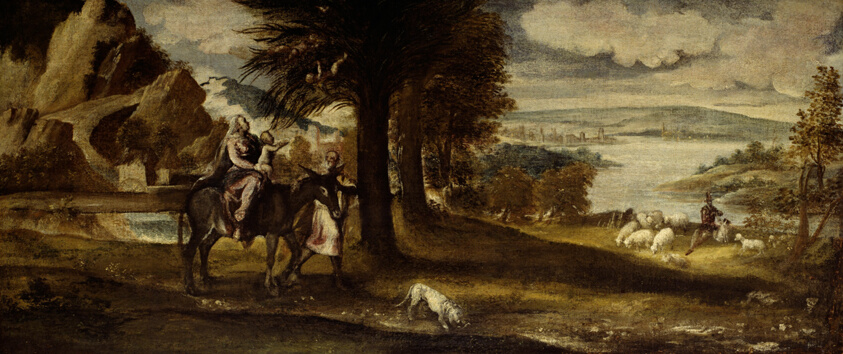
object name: Painting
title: The Flight into Egypt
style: sixteenth century, 16th Century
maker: Venetian (Attributed to Andrea Meldolla Schiavone (Italian, 1522-1564))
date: c. 1545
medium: Oil on canvas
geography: Venice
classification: oil on canvas; Italian; oil paintings (visual works); paint; painting; european painting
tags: holy family, animals, foliage, sky, clouds, biblical, religious scenes, religious figures, religious, religion, Christianity, Christian subjects, mountain, mountains, water, landscape, dog, tree of life, Virgin Mary, Virgin and child/Madonna and child, Jesus, sheep, donkeys, travel, Century of Progress, world's fairs, Chicago World's Fairs